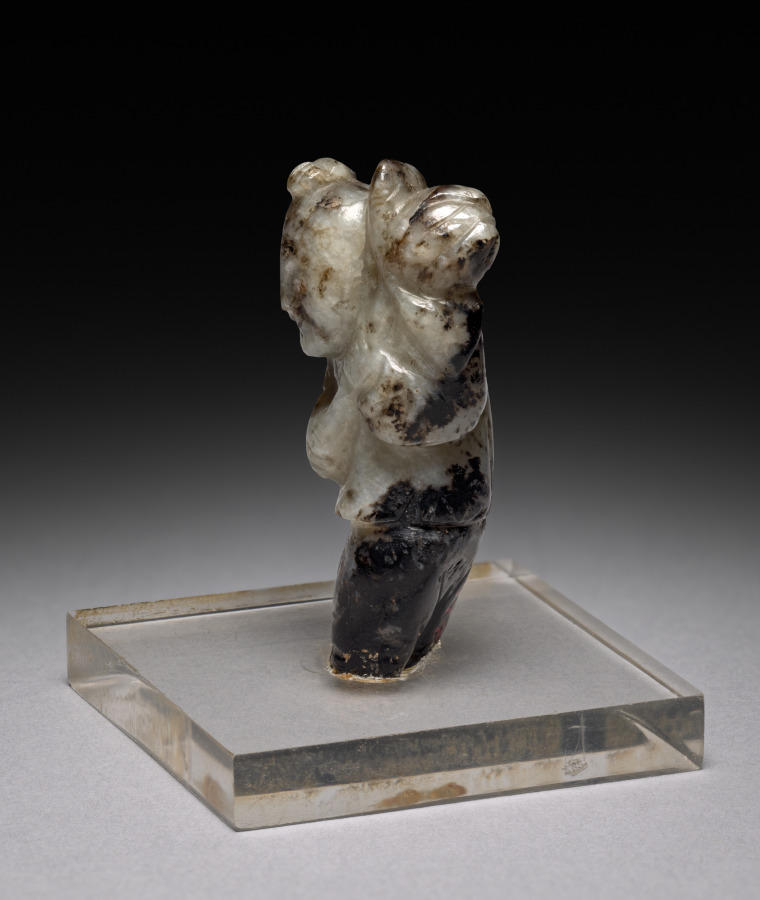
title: Boy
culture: China, Tang dynasty (618-907) - Song dynasty (960-1279)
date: 8th-10th Century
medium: jade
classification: Jade